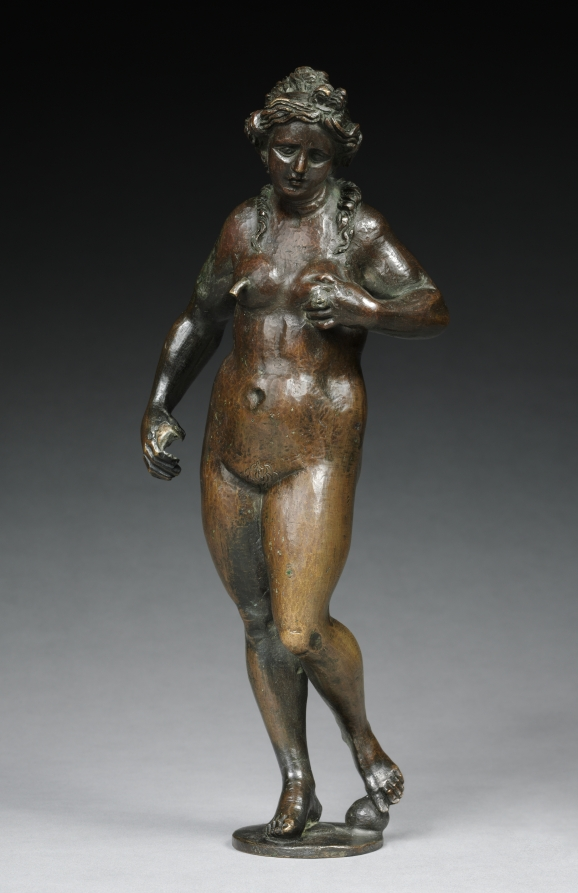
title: Fountain Figure of Abundance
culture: Germany, Augsburg, 16th century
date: c. 1530–40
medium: bronze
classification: Sculpture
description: The spout coming out of the breast indicates that this figure was part of a table fountain--a specialty of Augsburg artists. Her nudity and naturalistic proportions demonstrate the impact of Italian Renaissance art in southern Germany during the early 1500s.